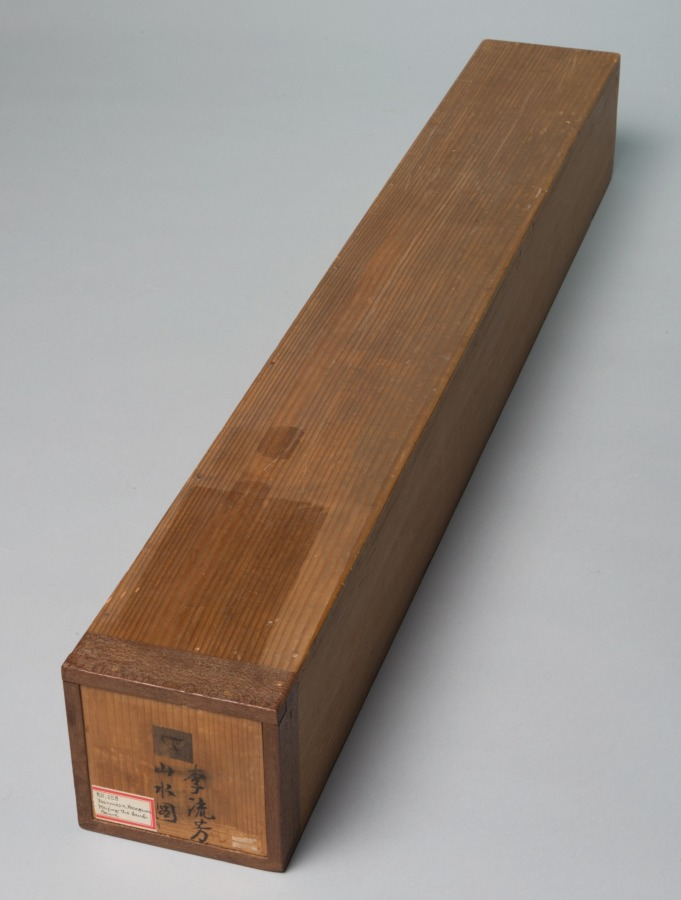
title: Playing the "Hand Game"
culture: Japan, Edo period (1615–1868)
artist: Hasegawa Yasumasa (Japanese)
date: c. 1760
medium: hanging scroll; ink and color on paper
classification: Painting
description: This scene depicts three people playing a game in which three players make hand gestures simultaneously. The relationship among the gestures determines the winner. Known as hand games, during the eighteenth century they were popular in Japan among courtesans. In this version, the contestants use both hands, indicating a special variation such as the fox hand game, which features gestures for a fox, a village leader, and a hunter.